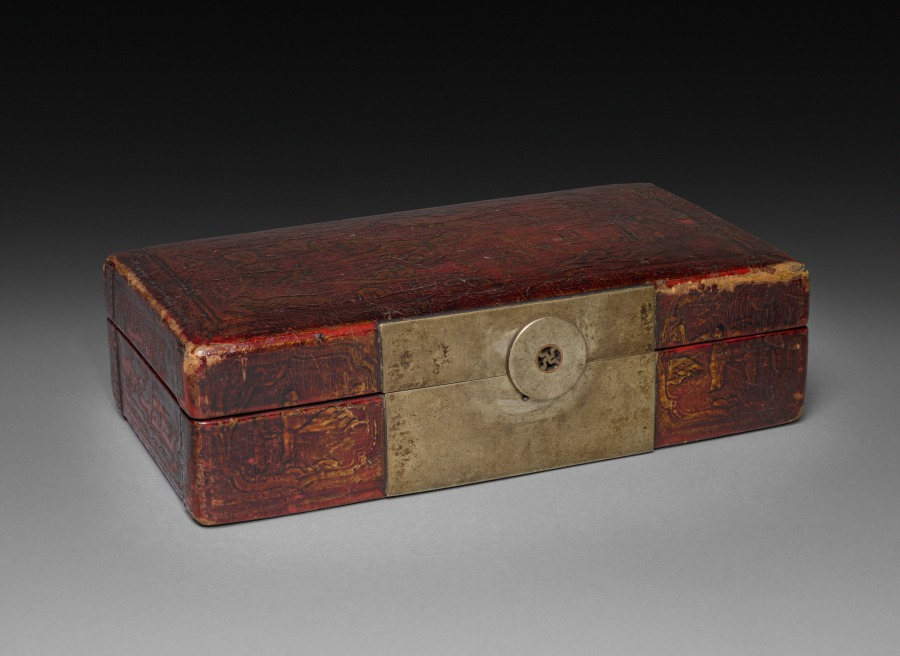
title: Box with Hinged Lid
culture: Japan, Edo period (1615–1868)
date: 1700s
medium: lacquer; metal hinges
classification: Lacquer